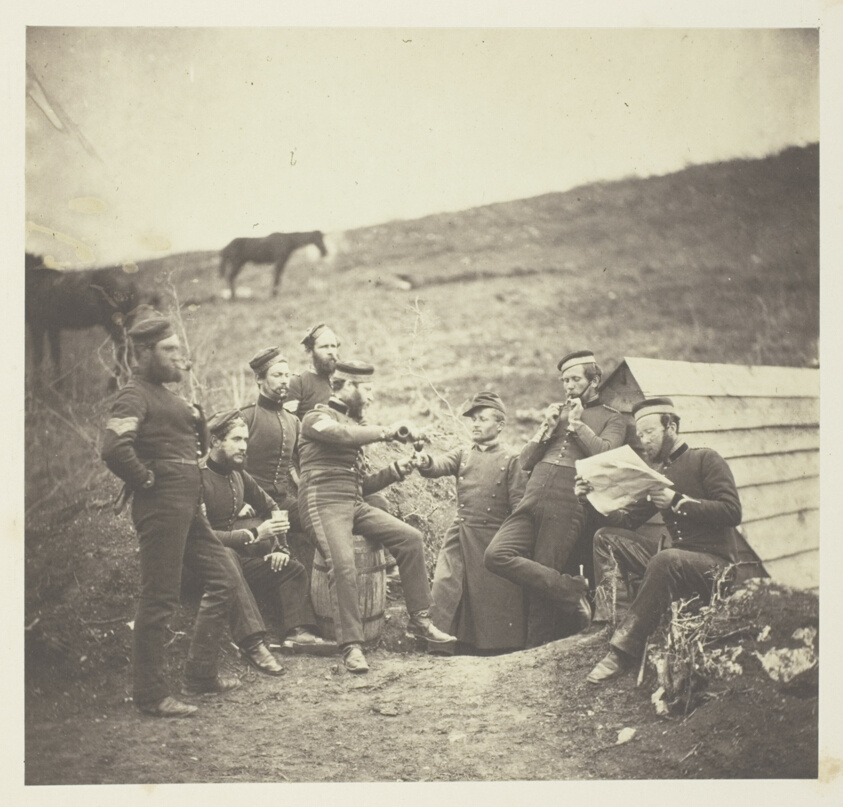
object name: Photograph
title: L'Entente Cordiale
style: 19th century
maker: Roger Fenton (English, 1819–1869)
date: 1855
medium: Salted paper print, plate 22 from the album "Photographs Taken in the Crimea" (1856)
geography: England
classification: salted paper print; photographic process; photography; photograph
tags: Collected by Hugh Edwards, Crimea 1856